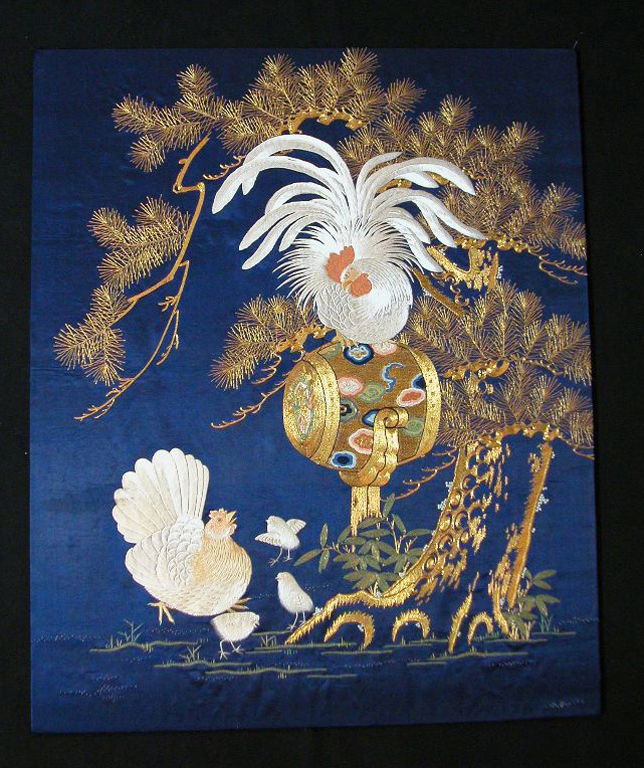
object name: Textile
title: Fukusa (Gift Cover)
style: late edo, meiji, edo (japanese period), Japanism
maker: Japan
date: late Edo period (1789–1868)/ Meiji period (1868–1912), 19th century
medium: SIlk, satin weave; embroidered with silk and gold-leaf-over-lacquered-paper-strip-wrapped cotton in single back, Chinese knot, satin, single satin and stem stitches; laidwork, couching and paper-padded couching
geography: Japan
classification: textile; needlework (visual works); weaving